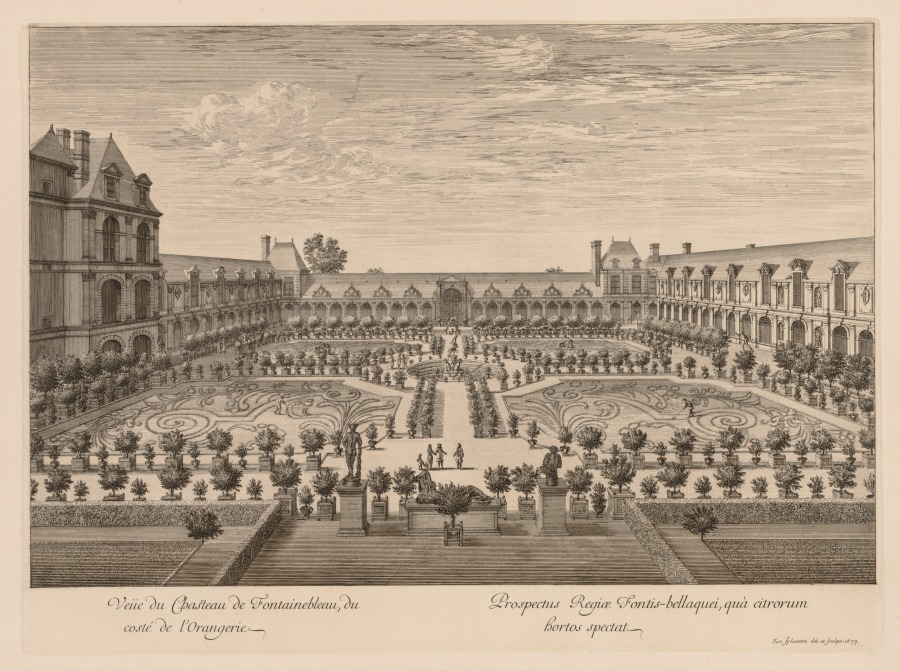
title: Vue du Château de Fontainebleau, du côté de l'Orangerie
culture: France, 17th century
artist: Israël Silvestre (French, 1621–1691)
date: 1679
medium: engraving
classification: Print